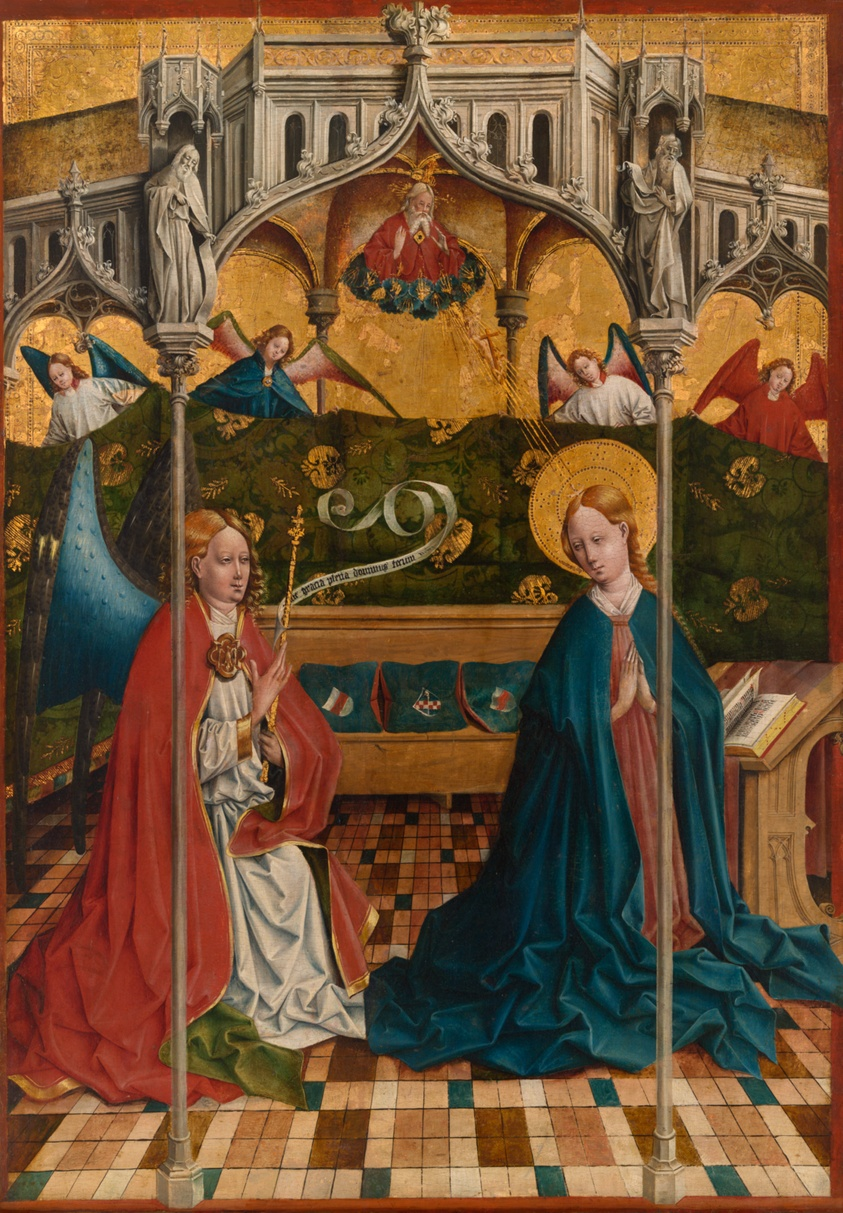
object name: Painting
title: The Annunciation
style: 15th century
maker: Johann Koerbecke (German, about 1420–1490)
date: Completed by 1457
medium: Oil on panel, transferred to canvas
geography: Germany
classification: oil on panel; oil on canvas; german; oil paintings (visual works); paint; painting; european painting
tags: Virgin Mary, Germany, architecture, architecture, architectural, architechture, fabric, interior, bibles, prayer, angels, altar, religious scenes, religious, biblical, Christianity, Christian subjects, Century of Progress, world's fairs, Chicago World's Fairs